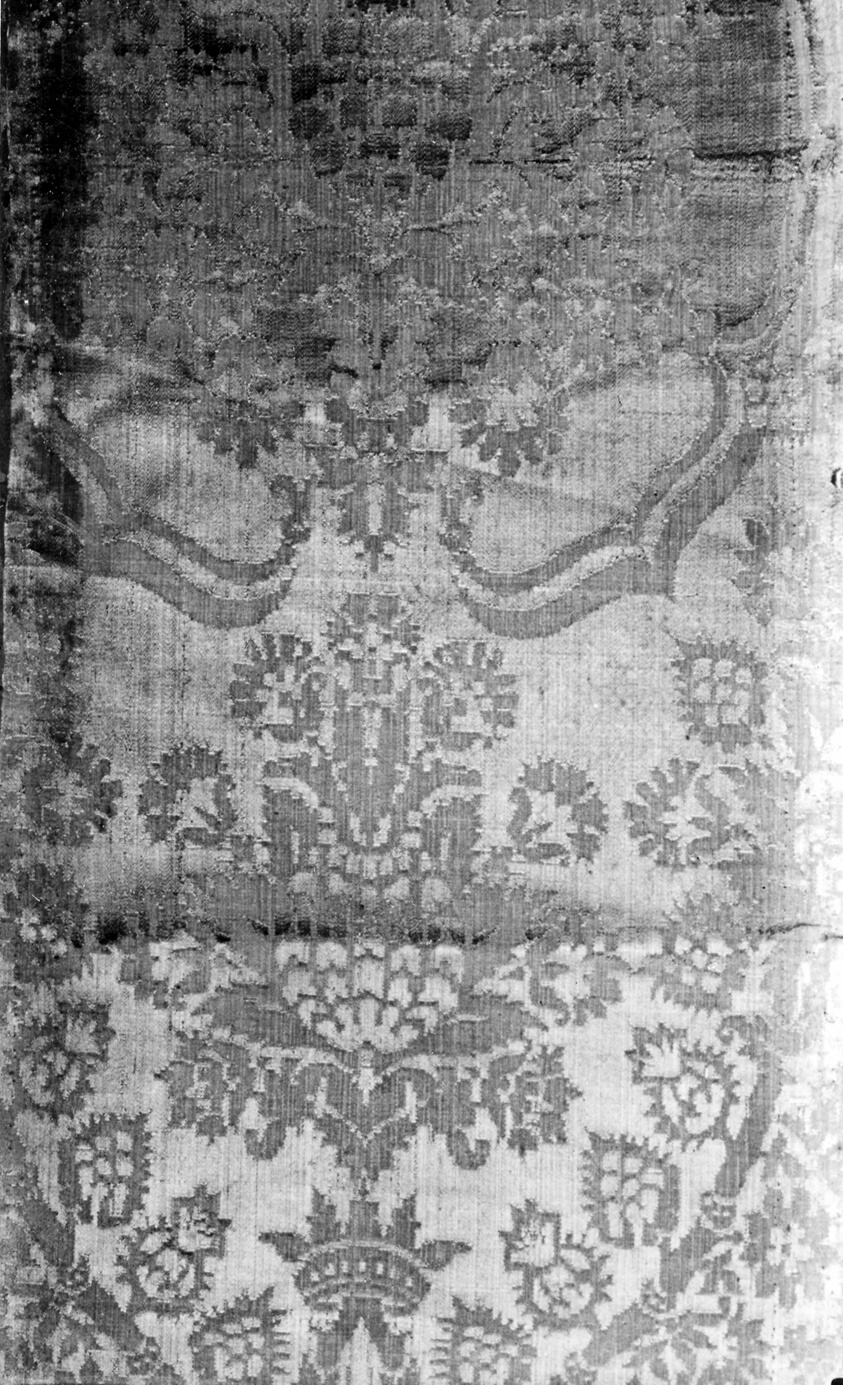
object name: Textile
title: Fragment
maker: Italy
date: 16th century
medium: simple satin damask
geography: Italy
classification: textile; weaving